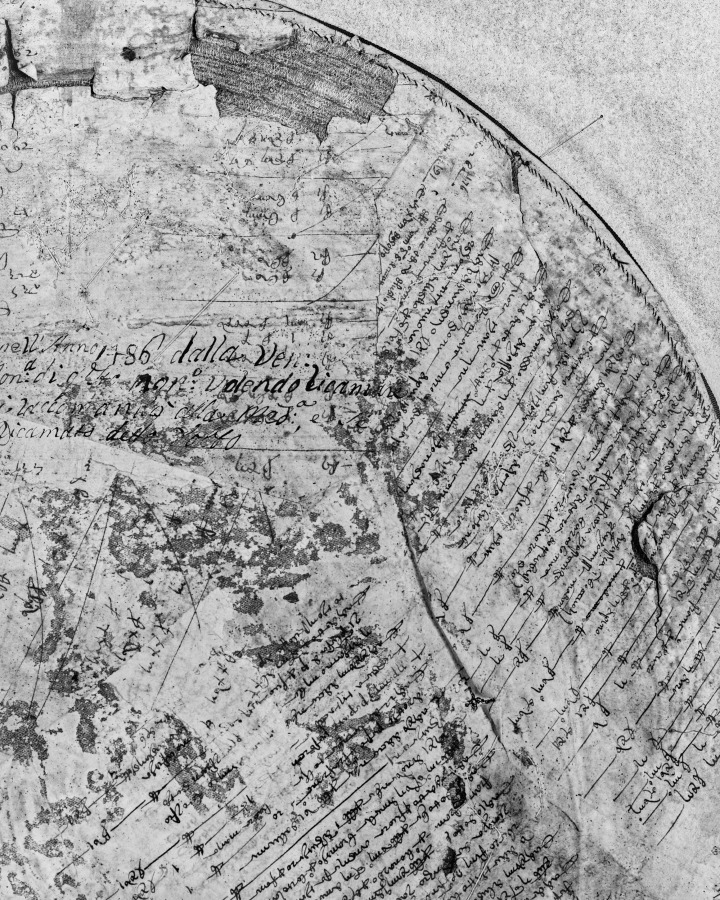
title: Embroidered Tondo from an Altar Frontal: The Coronation of the Virgin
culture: Italy, Florence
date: 1459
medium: Embroidery with gold, silver, and silk thread; split, satin, and couching stitches, or nué (shaded gold)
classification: Embroidery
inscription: the embroidery is backed by an old reused parchment with Latin writing over which in Italian is penned an inscription: "This pallioto was embroidered in the year 1486 by the venerable Margherita del Caccia nun of this monastery. . ." [It is difficult to know to what extent one should rely on this inscription as the style and technique both point clearly to an earlier date.]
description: This masterpiece of Florentine embroidery takes the circular form called a tondo and was likely once attached to an altar frontal. The scene depicts the coronation of the Virgin, the final and culminating event in the narrative cycle of her life. Honoring her as queen of heaven, Christ places the crown on his mother’s head. They are surrounded by eight angels as well as Saints Verdiana and John Gualberto, both much esteemed in Florence, creating a joyous scene. During the Renaissance, Florence emerged as an important center for a specific type of embroidery known as or nué, or shaded gold. This stunning technique used metal and silk threads, as seen here, to create pictures that rivaled paintings. It was frequently used for vestments and altar frontals.